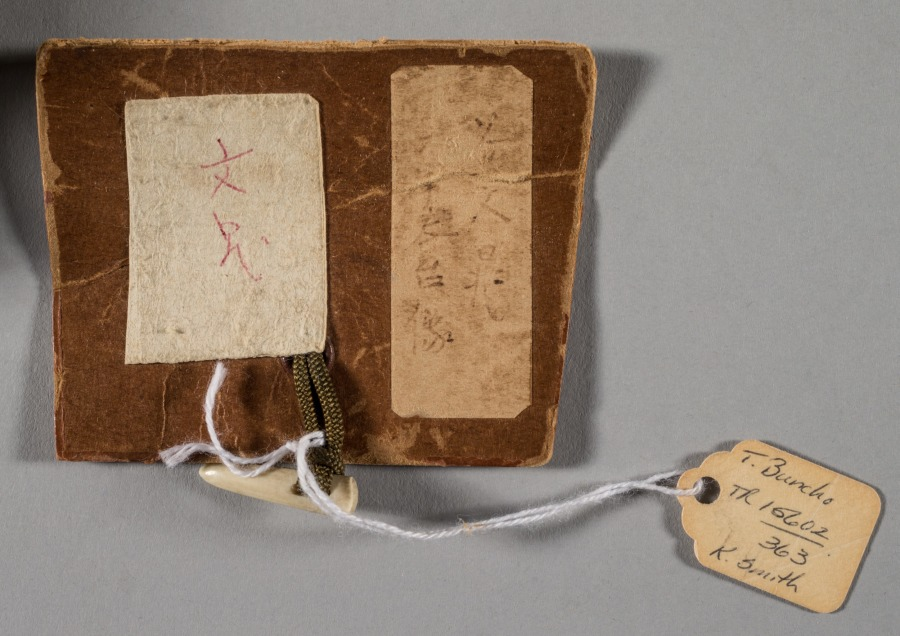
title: Imaginary Portrait of Shundai Dazai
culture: Japan, Edo period (1615–1868)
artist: Tani Bunchō (Japanese, 1763–1841)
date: late 1700s–1800s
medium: hanging scroll; ink and color on paper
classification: Painting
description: Shundai (1680–1747) was a noted Confucian scholar and writer. Brought up with a strongly Confucian family background, Bunchō’s veneration for Shundai is understandable. The inscription is by Nozawa Hikoroku, a scholar and poet contemporary with Bunchō.